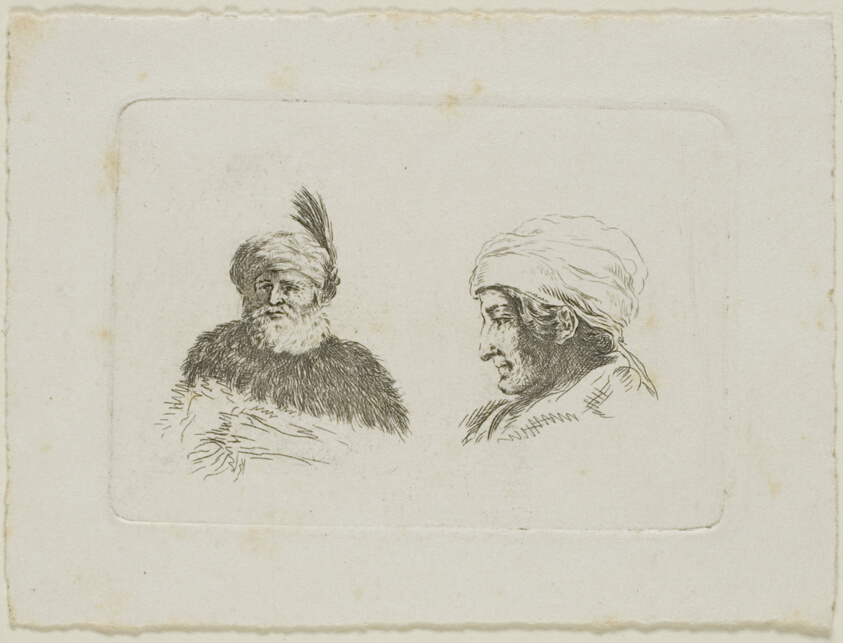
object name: Print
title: Caprice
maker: Jean-Baptiste de Grateloup (French, 1735-1817); Jean Pierre Sylvestre (French)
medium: Etching on paper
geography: France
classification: etching; print; prints and drawing